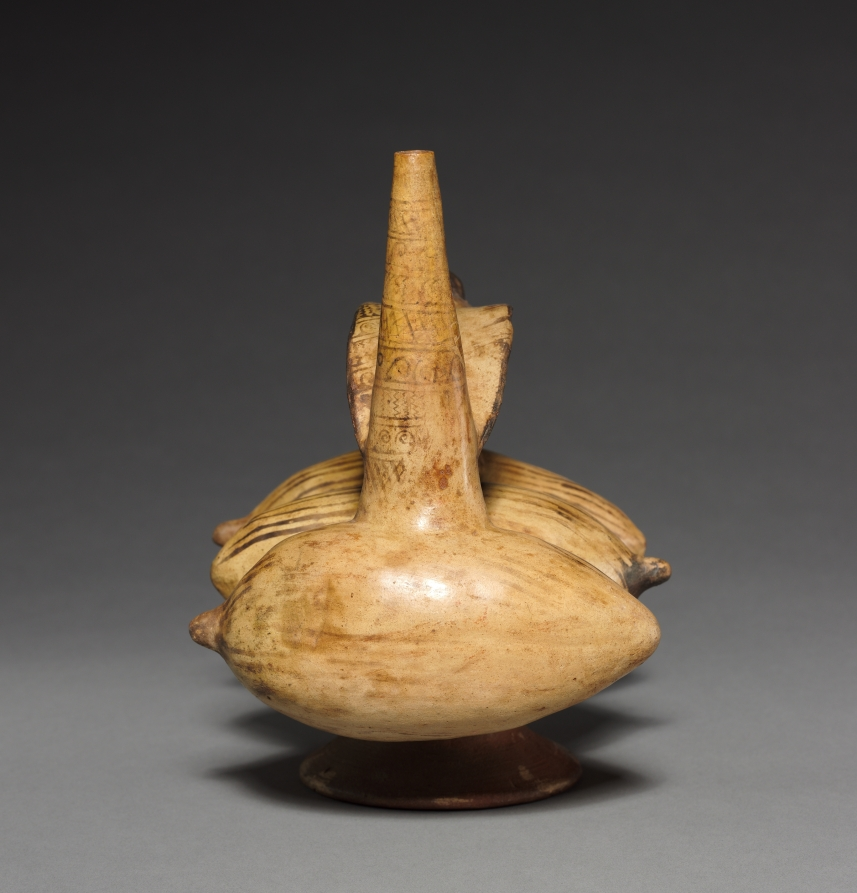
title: Stirrup Jar with Monkey and Three Fruits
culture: Peru, North Coast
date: 1000 or later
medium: red earthenware decorated with cream-colored slip and brown pigment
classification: Ceramic